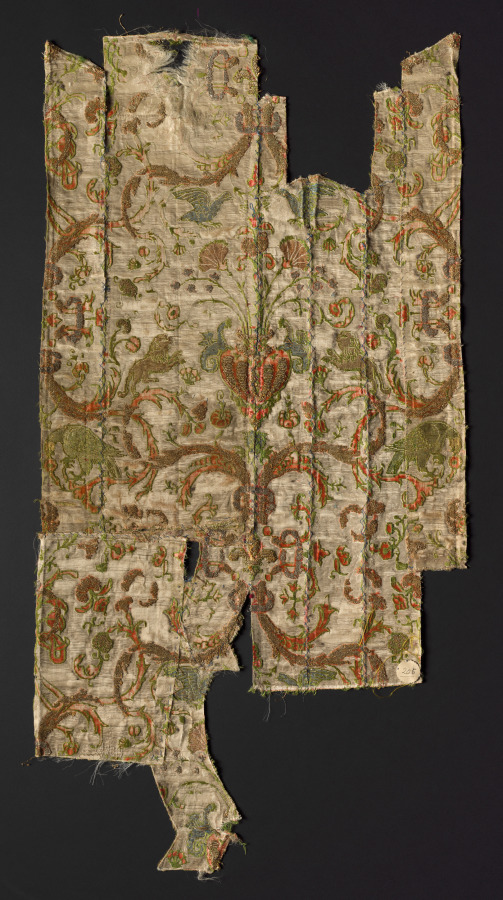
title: Fragment of Brocaded Velvet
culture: Spain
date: 1500s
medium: velvet (cut, uncut, voided, brocaded); silk and metal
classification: Velvet